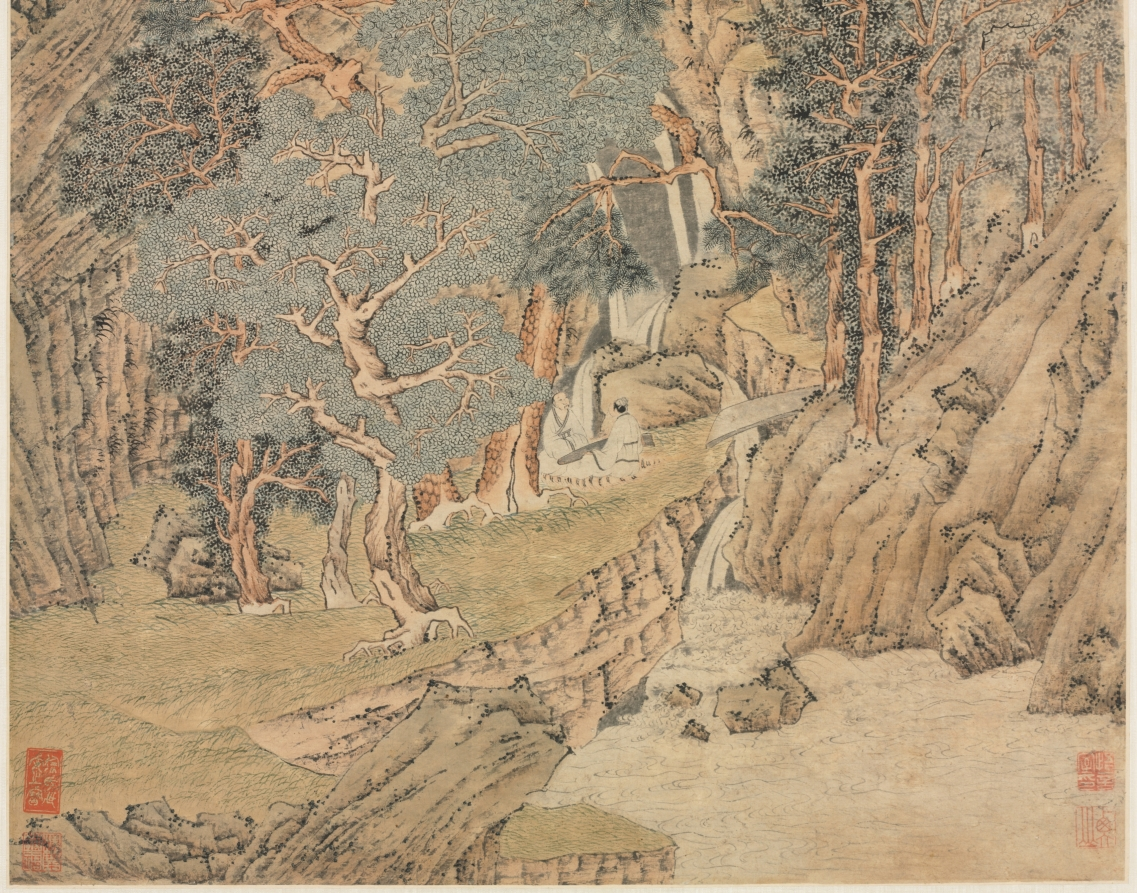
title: Playing the Qin in a Secluded Valley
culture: China, Ming dynasty (1368–1644)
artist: imitator of Wen Zhengming (Chinese, 1470–1559)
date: 1548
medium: hanging scroll; ink and light color on paper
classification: Painting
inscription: 幽壑鳴琴。 萬疊高山供道眼，千尋飛瀑淨塵心。 憑將一曲朱絃琴，小答松風太古音。 嘉慶戊申夏四月徵明製 [印] 徵明; 徵仲父印 [右下方] 悟言室印; 衡山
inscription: 4 additional seals: 3 of Cheng Qi 程琦 (1911–1988); 1 unidentified.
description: The poem inscribed in this painting reads: "Ten thousand layered lofty mountains are presented to the cultivated eye, A thousand feet of cascading falls cleanse the dusty heart. May the harmonies of my red-stringed tune Be the humble answer to the pine wind's ancient song." Different versions of this painting exist. Scholars have suggested that the solid renderings of the rock masses and the volumetric mountain configurations as seen here appear more characteristic of Lu Zhi 陸治 (1496–1576), Wen Zhengming's pupil.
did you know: In paintings, Chinese literati often play the instrument in a landscape setting, as the sound of the qin symbolizes harmony between man and nature.